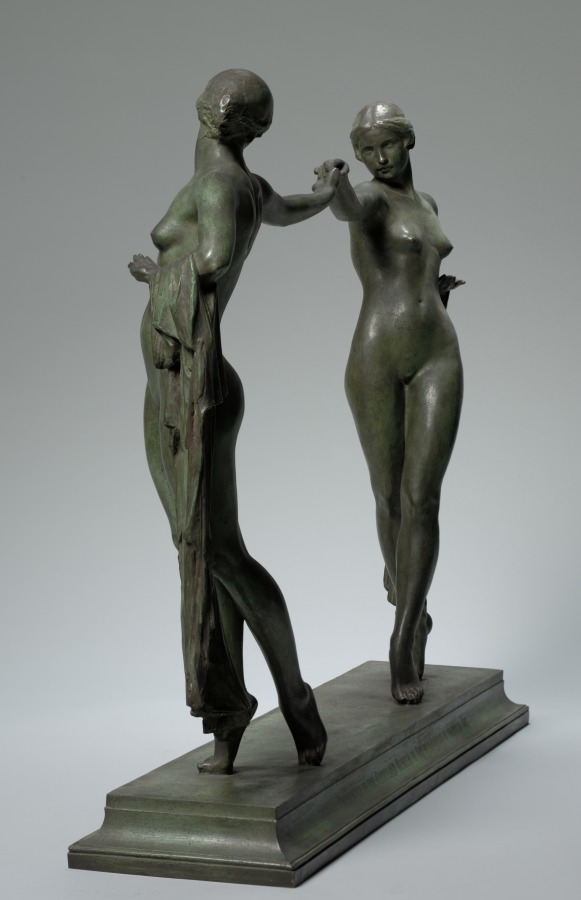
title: Andante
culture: America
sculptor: Mario Korbel (American, born Bohemia [now Czech Republic], 1882–1954)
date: 1917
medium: bronze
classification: Sculpture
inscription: signed on base: MARIO KORBEL 1917 ©